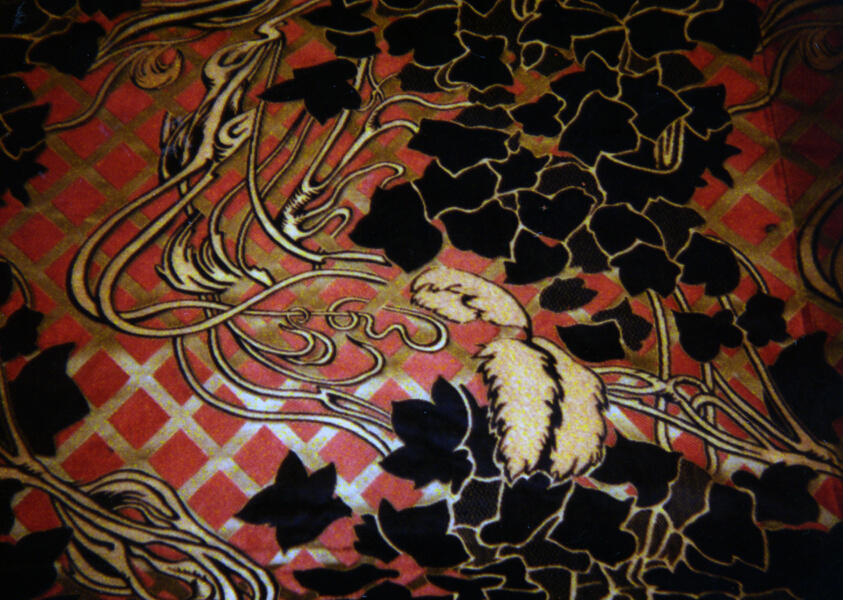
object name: Textile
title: Panel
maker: France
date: 1890s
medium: Silk and cotton, complementary warp, warp-float faced 7:1 and 4:1 satin weaves with supplementary brocading wefts and with plain and twill interlacings of secondary binding warps and supplementary patterning wefts; incomplete panel and half panel joined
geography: France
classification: textile; weaving